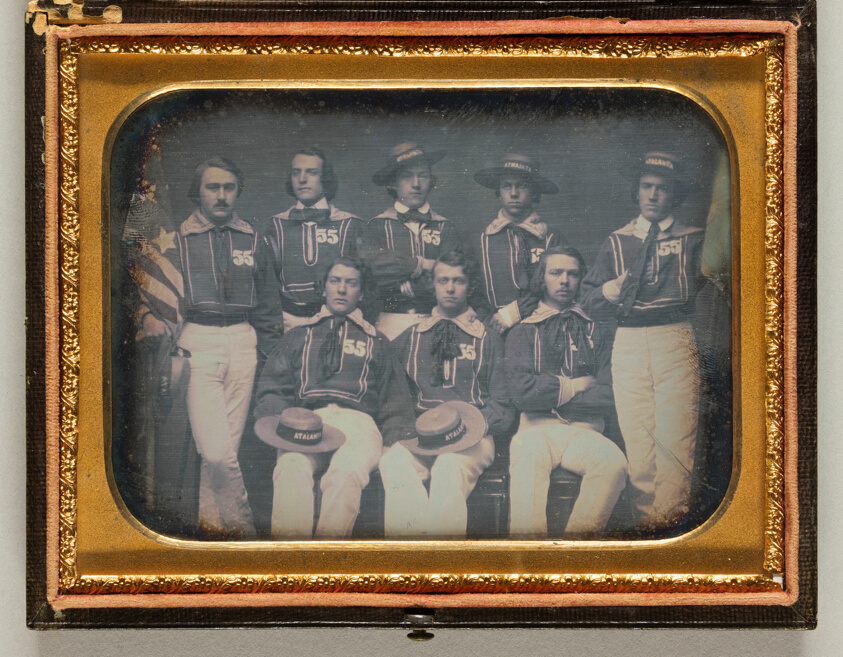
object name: Photograph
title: Untitled (Eight Atalanta Crewmen)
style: 19th century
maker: Artist unknown; American, 19th century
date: July 30, 1856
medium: Daguerreotype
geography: United States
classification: daguerreotype; photographic process; photography; photograph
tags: Collected by Hugh Edwards